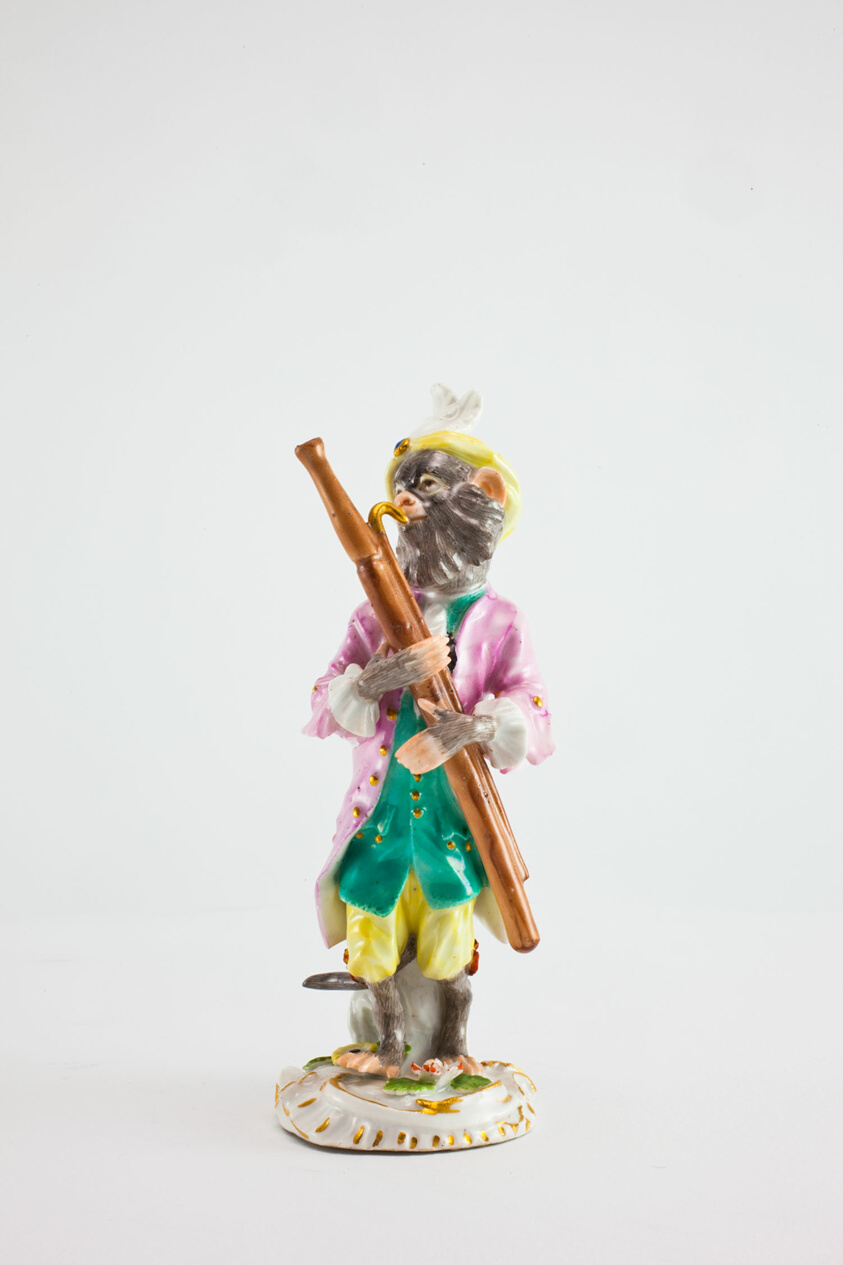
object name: Ceramics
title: Bassoon Player for the Monkey Band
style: Rococo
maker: Meissen Porcelain Manufactory,; German, founded 1710; After a model of Kändler or Reinicke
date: c. 1765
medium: Hard-paste porcelain, polychrome enamels, and gilding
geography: Meissen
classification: sculpture; ceramics; porcelain; european decorative arts